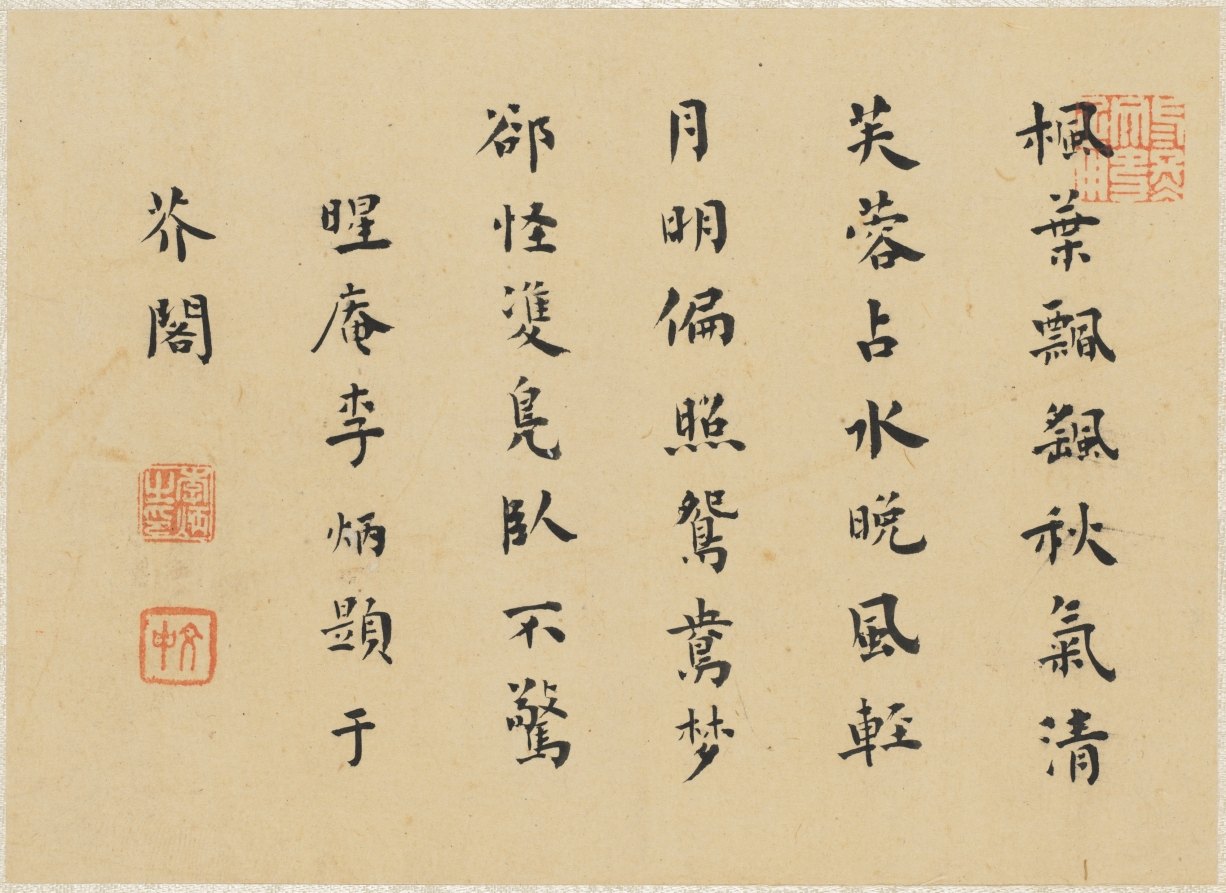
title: Album of Miscellaneous Subjects, Leaf 8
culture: China, Qing dynasty (1644-1911)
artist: Fan Qi (Chinese, 1616–after 1694)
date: early 1650s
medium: album leaf; ink and color on silk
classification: Painting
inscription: Artist seal: Fan Qi 樊圻. Poem by Li Bing 李炳 (17th century): Maple leaves drift in the wind, the autumn gusts bracing,/ Hibiscus flowers steeped with water, the evening breeze light./ The moonlight's slanting beams shine upon dreaming lovers./ No wonder that pair of fowl should dream of the absent partners.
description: Leaf 8 Li Bing's colophon reads: Maple leaves drift in the wind, the autumn gusts bracing, Hibiscus flowers steeped with water, the evening breeze light. The moonlight's slanting beams shine upon dreaming lovers. No wonder that pair of fowl should dream of their absent partners.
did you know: The rock changes from ochre to green deepening into azurite blue accented with delicate dots of malachite green.